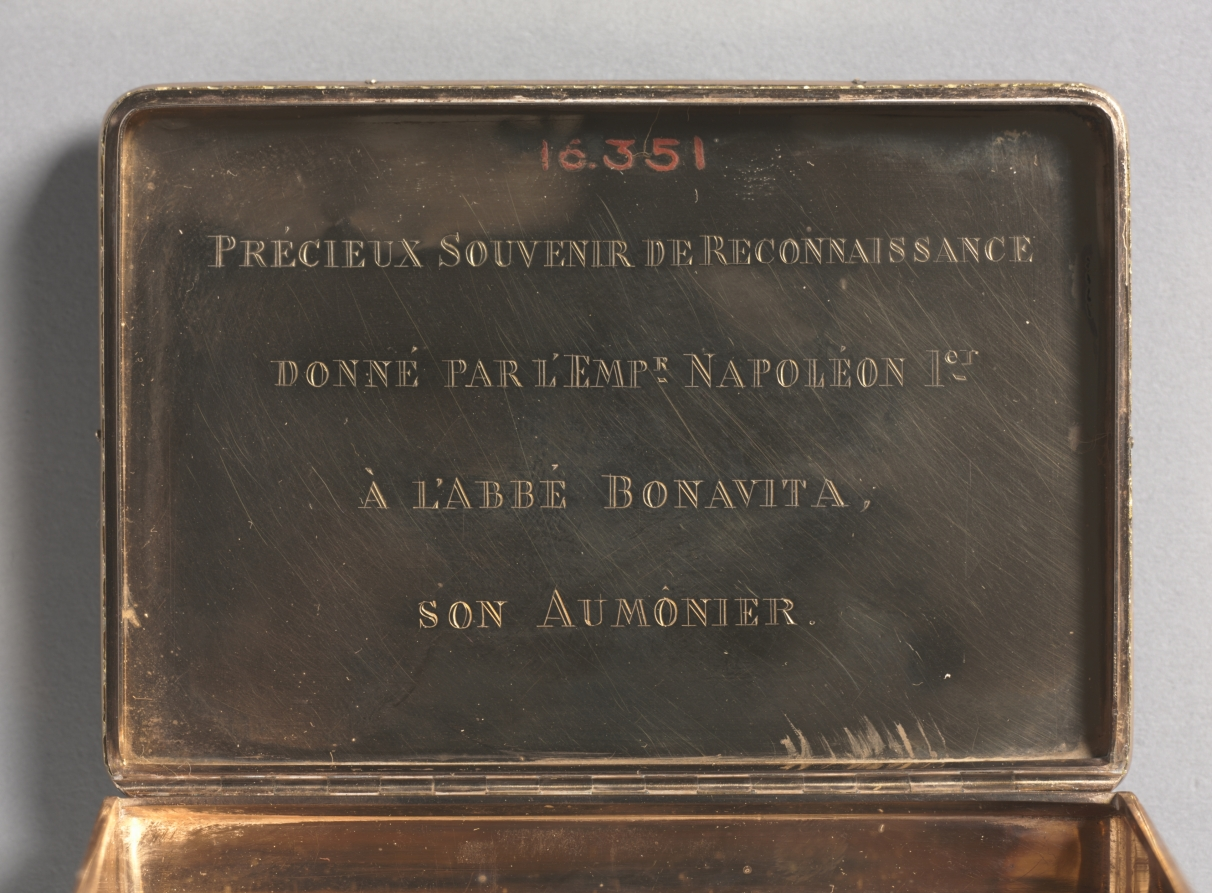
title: Portrait of Napoleon I, Emperor of the French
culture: Box: Switzerland; miniature: France, 19th century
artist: Jean-Baptiste Isabey (French, 1767–1855)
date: 1810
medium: watercolor on ivory in a Swiss gold box with diamonds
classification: Miscellaneous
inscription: inscribed inside cover: "Précieux souvenir de reconnaissance donné par l'Empr. Napoléon 1er à L'Abbé Bonavita, son Aumônier."